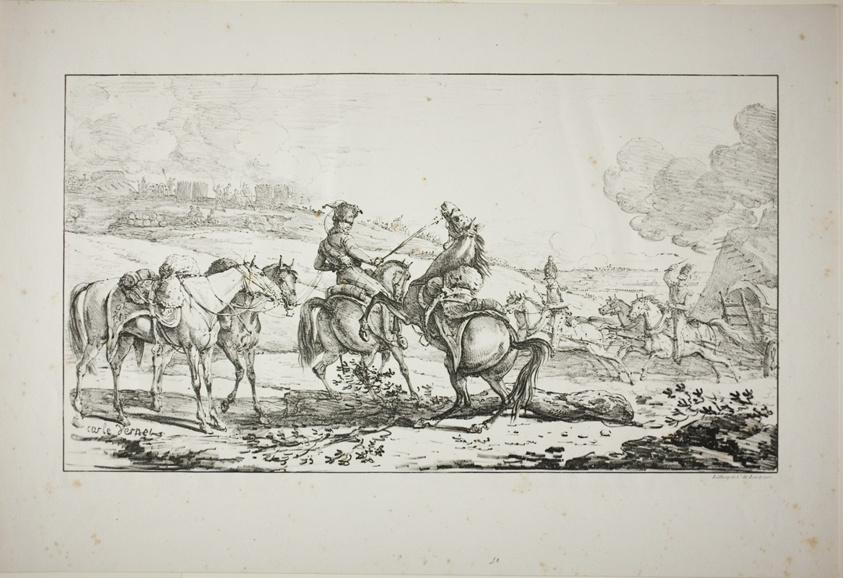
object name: Print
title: Mounted Artilleryman with Three Horses Bridled at Once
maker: Carle Vernet (French, 1758-1836); printed by Comte Charles Philibert de Lasteyrie (French, 1759-1849)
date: 1817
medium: Lithograph in black on ivory wove paper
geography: France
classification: lithograph; print; prints and drawing